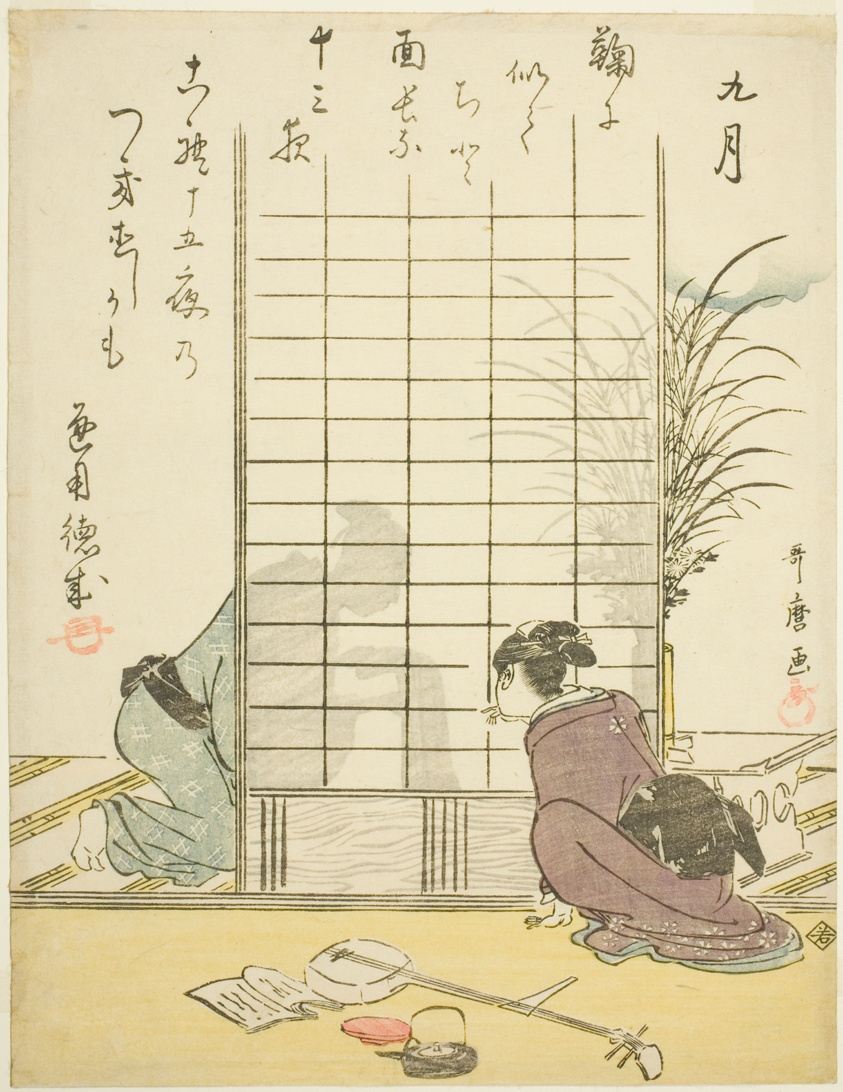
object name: Print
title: The Ninth Month (Kugatsu), from an untitled series of genre scenes in the twelve months, with kyoka poems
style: Japanese (culture or style)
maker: Kitagawa Utamaro 喜多川 歌麿; Japanese, 1753 (?)-1806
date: c. 1792/93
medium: Color woodblock print; chuban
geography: Japan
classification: woodblock print; print; asian art